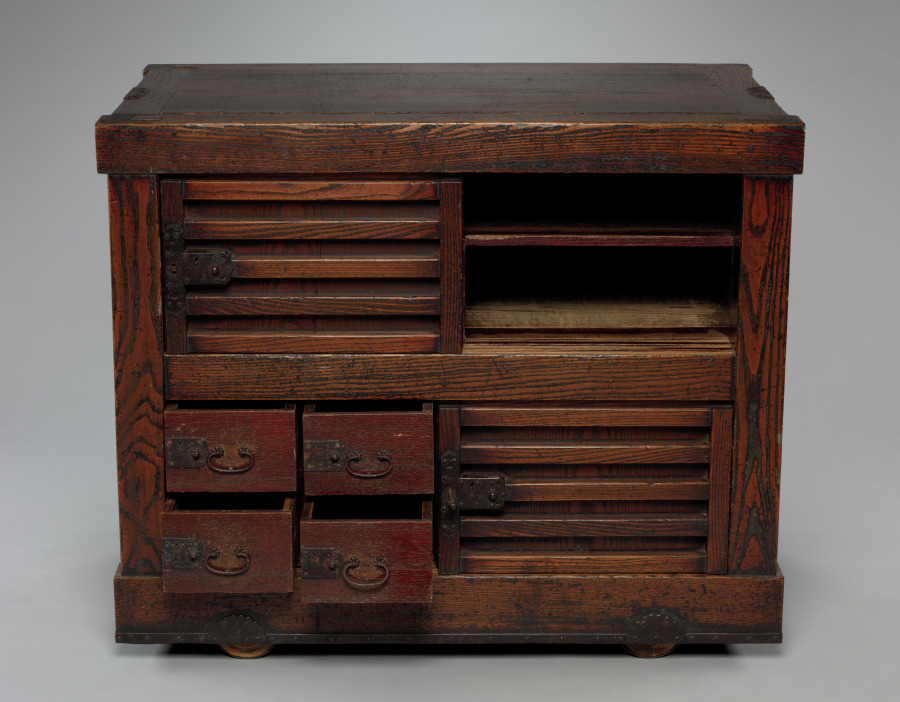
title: Chest on Wheels (Kurumadansu)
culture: Japan, Edo period (1615–1868)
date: 1715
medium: wood with iron fittings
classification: Furniture and woodwork